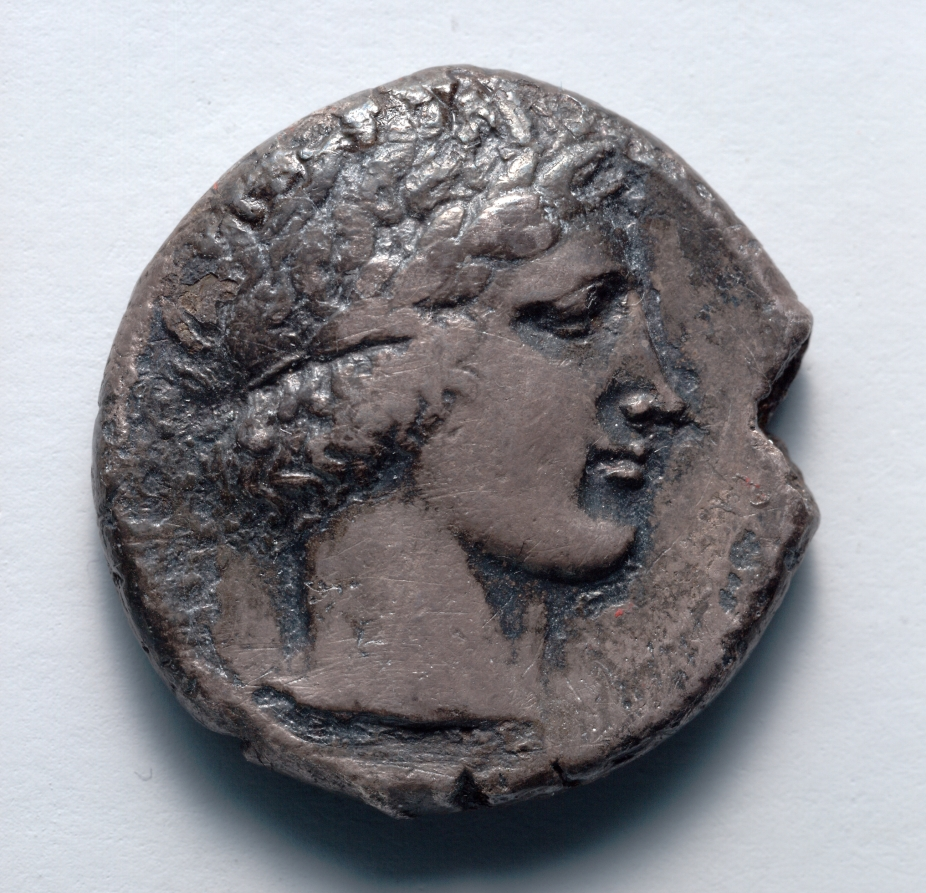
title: Tetradrachm: Head of Apollo, laureate (obverse)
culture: Greek, minted at Leontinoi (Sicily)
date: 466–422 BCE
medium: silver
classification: Coins